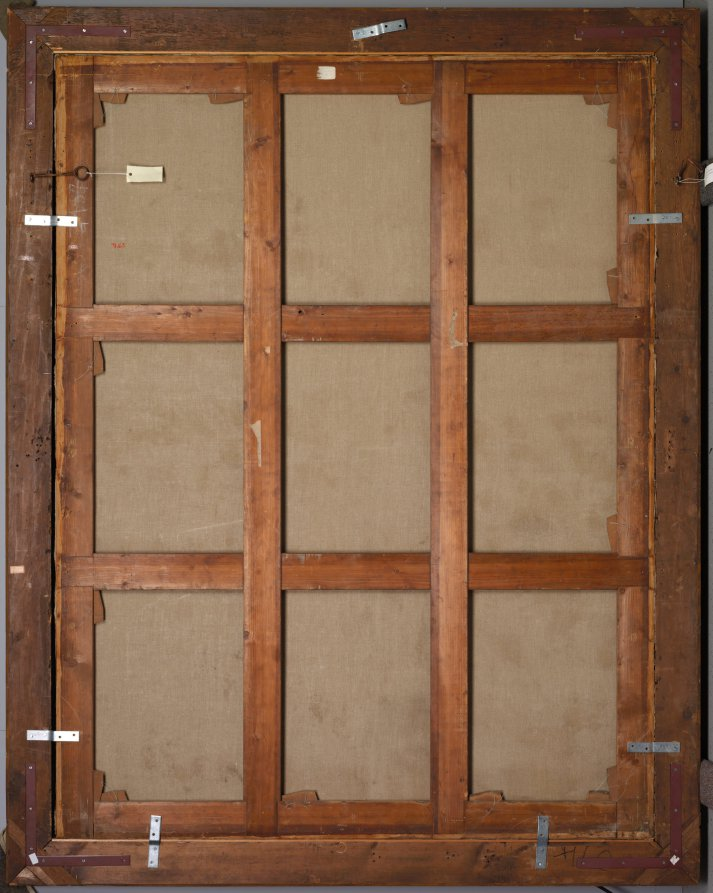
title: The Risen Christ Appearing to the Virgin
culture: Italy, 18th century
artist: Francesco Solimena (Italian, 1657–1747)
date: c. 1708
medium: oil on canvas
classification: Painting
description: The dramatic contrasts of light and dark reveal the long aftereffects of Caravaggio in Naples. Yet, the elegant forms, rich colors, and perfected body of Christ have far more affinities with the idealizing strand of Italian art in the 1600s and 1700s. Solimena sought to improve on nature, based on the study of antiquity, aiming to create a work of grandeur and nobility meant to inspire reverence and devotion appropriate to the holy subject.